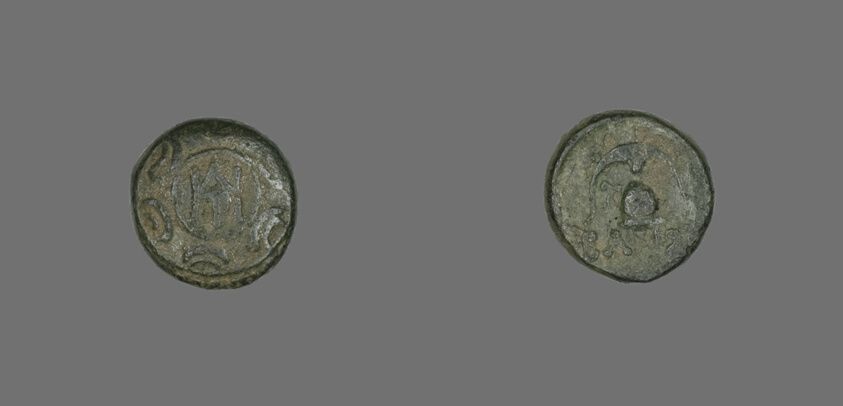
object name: Coin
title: Coin Depicting a Shield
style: greek, ancient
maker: Greek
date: 239-229 BCE, issued by King Demetrius II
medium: Bronze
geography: Greece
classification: coin; ancient art; struck